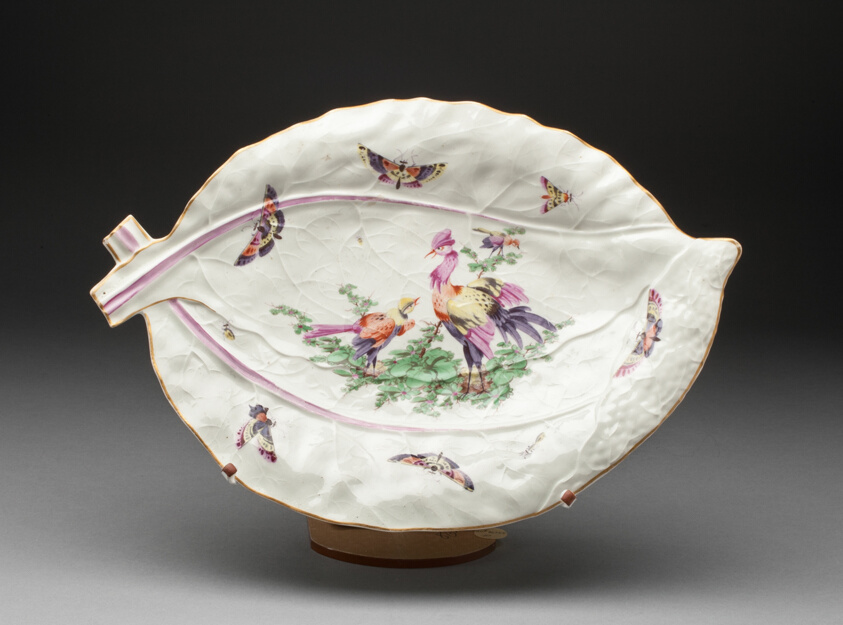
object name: Ceramics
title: Dish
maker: Worcester Porcelain Factory (Warmstry House Period, 1751–1783); Worcester, England, founded 1751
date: c. 1760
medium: Soft-paste porcelain, polychrome enamels and gilding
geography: Worcester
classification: plate (general, dish); dish (vessel); porcelain; european decorative arts; ceramics